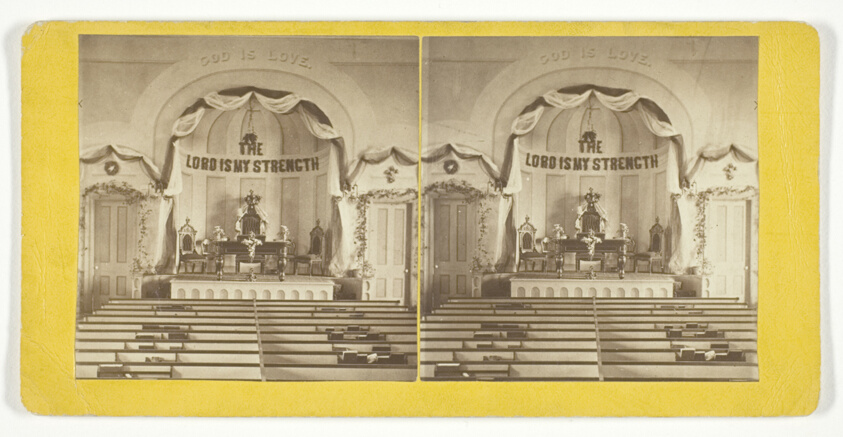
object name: Photograph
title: Untitled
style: 19th century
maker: L.V. Moulton (American, active 1870s)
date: late 19th century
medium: Albumen print, stereo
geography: United States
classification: photography; photograph